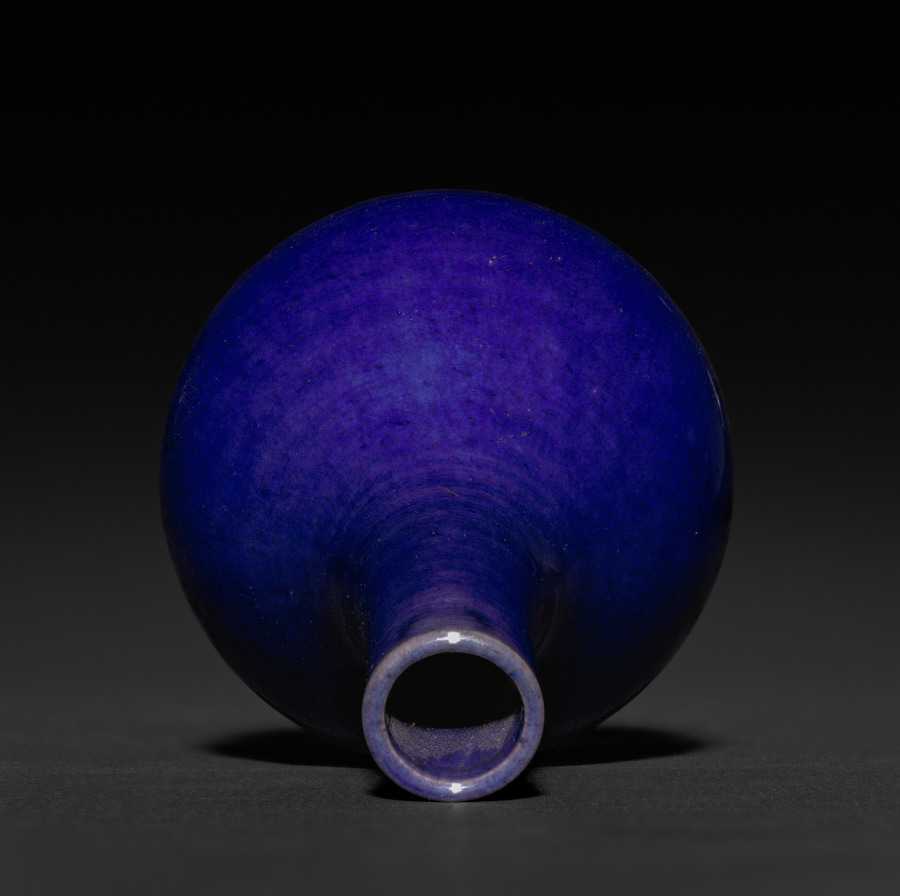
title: Bottle-Shaped Vase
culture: China, Qing dynasty (1644–1911), Qianlong reign (1736–95)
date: 1736–95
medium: porcelain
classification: Ceramic